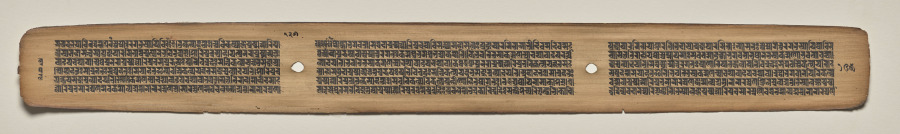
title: Text, Folio 125 (verso), from a Manuscript of the Perfection of Wisdom in Eight Thousand Lines (Ashtasahasrika Prajnaparamita-sutra)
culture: Eastern India, Bihar, Vikramashila Monastery. Painting: Nepal, Kathmandu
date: Sunday, September 14, 1119 (year 239 of the Newar Samvat in the month of Ashvina)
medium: gum tempera and ink on palm leaves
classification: Painting